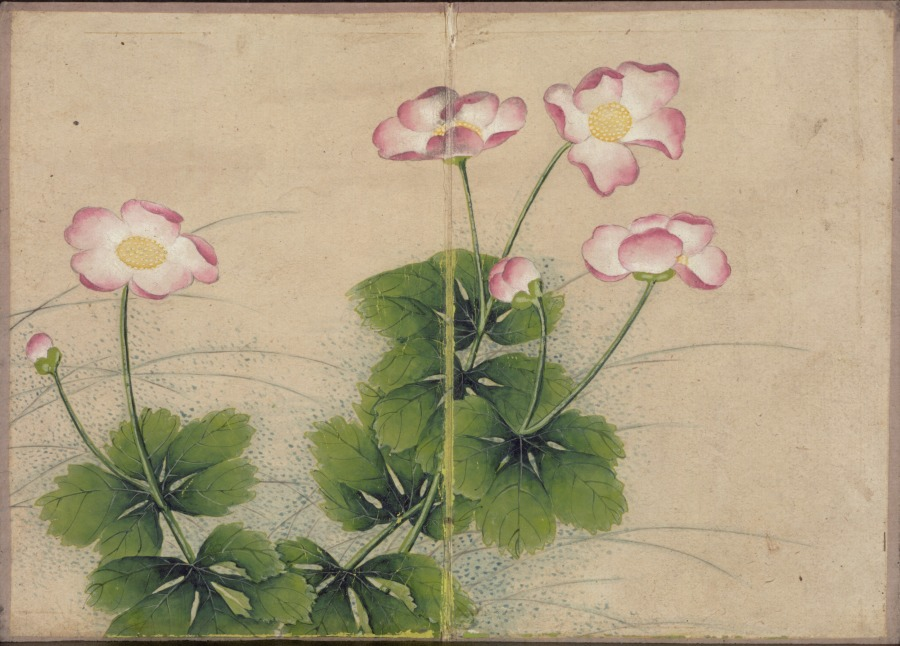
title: Desk Album: Flower and Bird Paintings (mallow flowers)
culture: China, Qing dynasty (1644-1911)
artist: Zhang Ruoai (Chinese, 1713–1746)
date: 1700s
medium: album leaf, ink and color on paper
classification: Painting